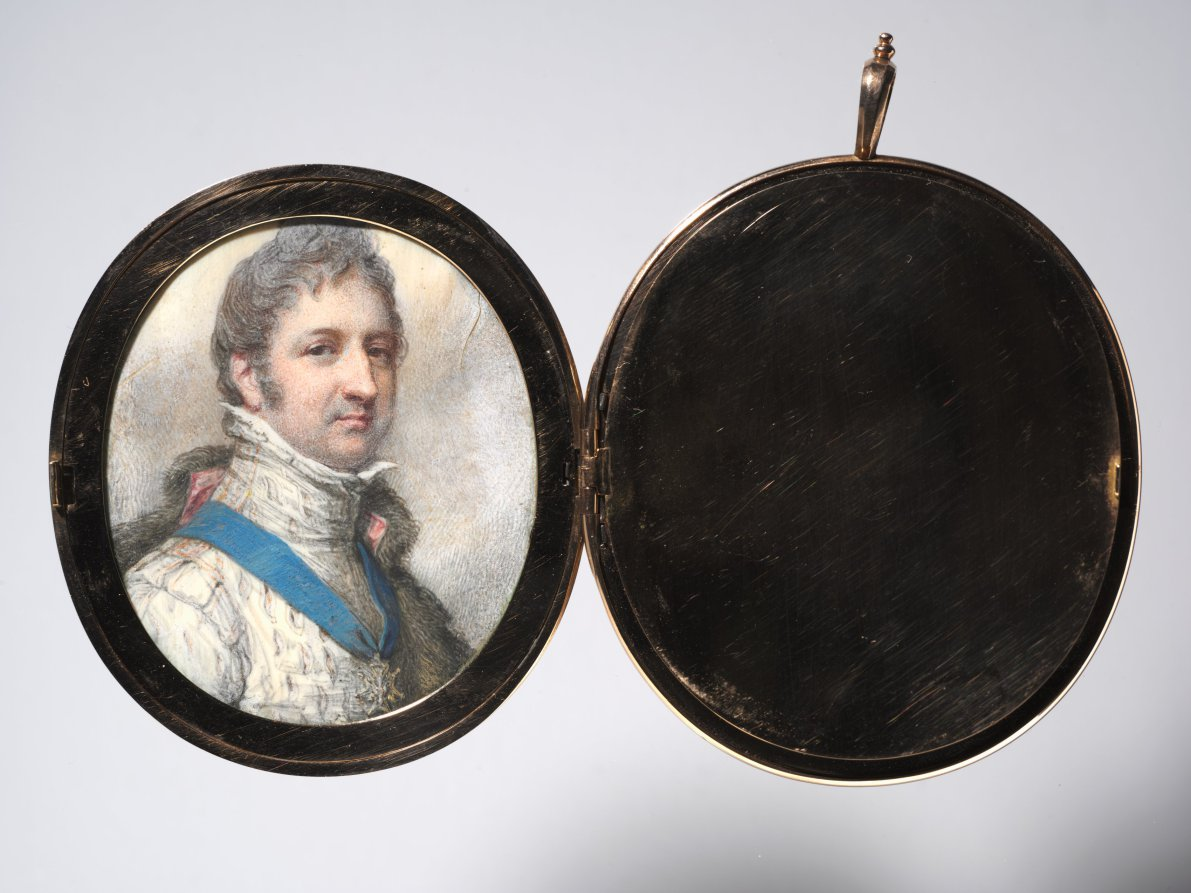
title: Portrait of Louis-Philippe, Duke of Orléans, later King of the French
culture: England, early 19th Century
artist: Richard Cosway (British, 1742–1821)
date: 1804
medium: watercolor on ivory in a gold locket frame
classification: Portrait Miniature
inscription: signed on backing: Rdus Cosway / R.A. et F.S.A. / Primarius Pictor / Serenissimi Walliae / Principie / Pinxit / 1804.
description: Louis-Philippe (1773–1850, king of the French 1830–48) was the son of Louis-Philippe Joseph, duc d’Orléans, who was known as Philippe-Egalité during the French Revolution. The Orléans family was a branch of the House of Bourbon. This work was painted while Louis-Philippe was in exile and living in England from 1800 until 1815, when Napoleon abdicated. He finally succeeded Charles X as king of France in 1830. During the February Revolution of 1848, Louis-Philippe was again forced into exile in England where he died two years later. Richard Cosway had painted Louis-Philippe (as well as his siblings and father) when the family was in England immediately following the outbreak of revolution in 1789. Louis-Philippe would have been thirty-one years old when this work was executed. He wears the Order of the Holy Spirit, a chivalric order of the French monarchy, which can be distinguished by its white dove surrounded by green flames at the center of a Maltese cross, with fleur-de-lis between the arms of the cross. Instead of the brilliant turquoise and white cloud background traditionally associated with Cosway, this miniature has the more restrained, gray, hatched background that characterizes the artist’s later works. The surface of the work is much marred by an irreversible crystallization of the paint layer that further emphasizes the gray tones throughout. The form of the unmarked case is typically English, but the motif is French, which may indicate a French goldsmith imitating the English style. The motif resembles a swan composed of foliate scrolls. A lock of plaited brown hair is also enclosed under glass within the locket, facing the miniature.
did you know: Without DNA analysis it is impossible to know to whom the hair belonged, though the most likely candidate is Louis-Philippe himself.